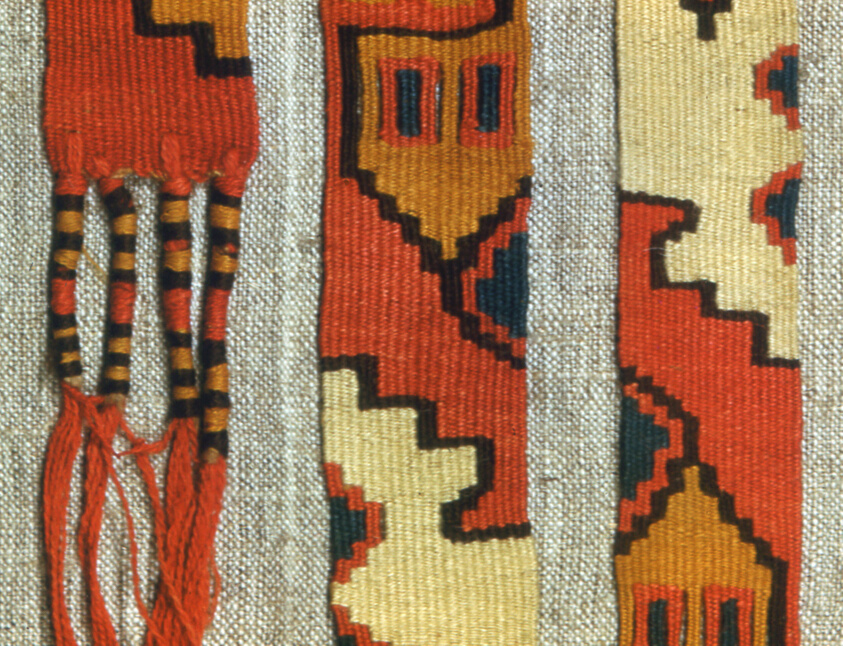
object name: Textile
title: Band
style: nazca, andean, andes, Pre-Columbian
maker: Nazca-Wari; Probably south coast, Peru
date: A.D. 700/900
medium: Slit tapestry with fringe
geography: Peru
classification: textile; weaving